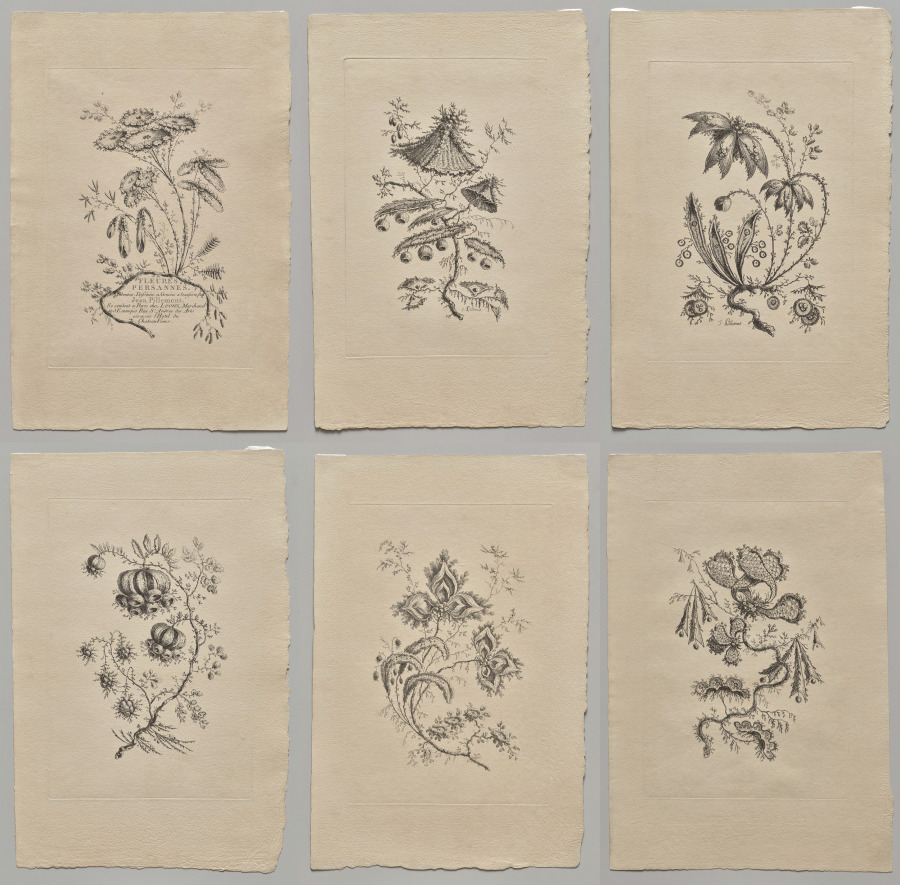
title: Persian Flowers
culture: France, 18th century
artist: Jean Baptiste Pillement (French, 1728–1808)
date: 1755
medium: series of 6 etchings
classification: Print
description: Jean Baptiste Pillement was one of the most influential designers of the Rococo period, known for his varied and prolific chinoiseries (European variants of Chinese and Japanese motifs). His designs were spread throughout Europe primarily via their translation into prints. This print is one of a set of six etched by Pillement himself. Each depicts a so-called “Persian” flower, largely fantasies, presenting strange, alienlike floral forms that could be adapted to various uses from textiles to wall decorations.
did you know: The artist Jean Baptiste Pillement was employed by Marie Antoinette to create decorations for her legendary retreat, the Petit Trianon, at Versailles.